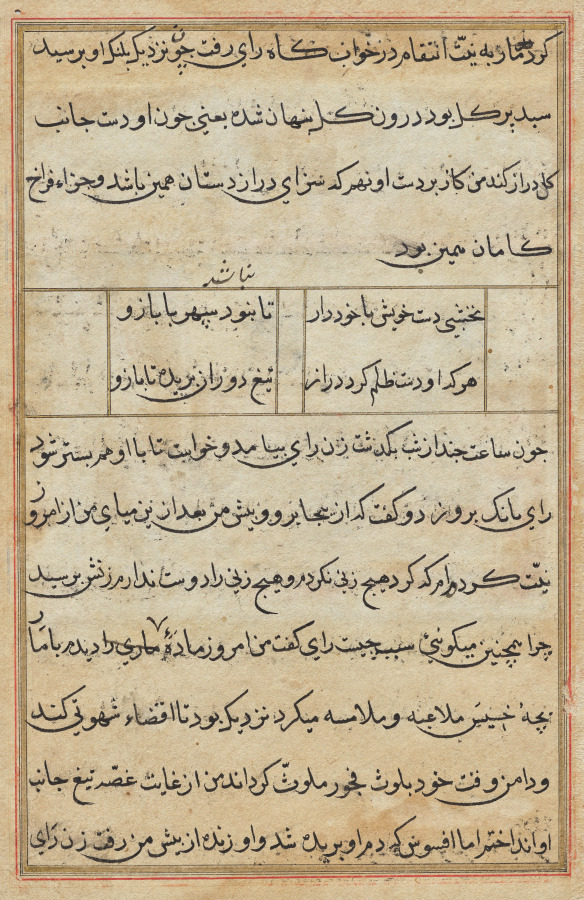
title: Page from Tales of a Parrot (Tuti-nama): text page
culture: Mughal India, court of Akbar (reigned 1556–1605)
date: c. 1560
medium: gum tempera, ink, and gold on paper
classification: Painting